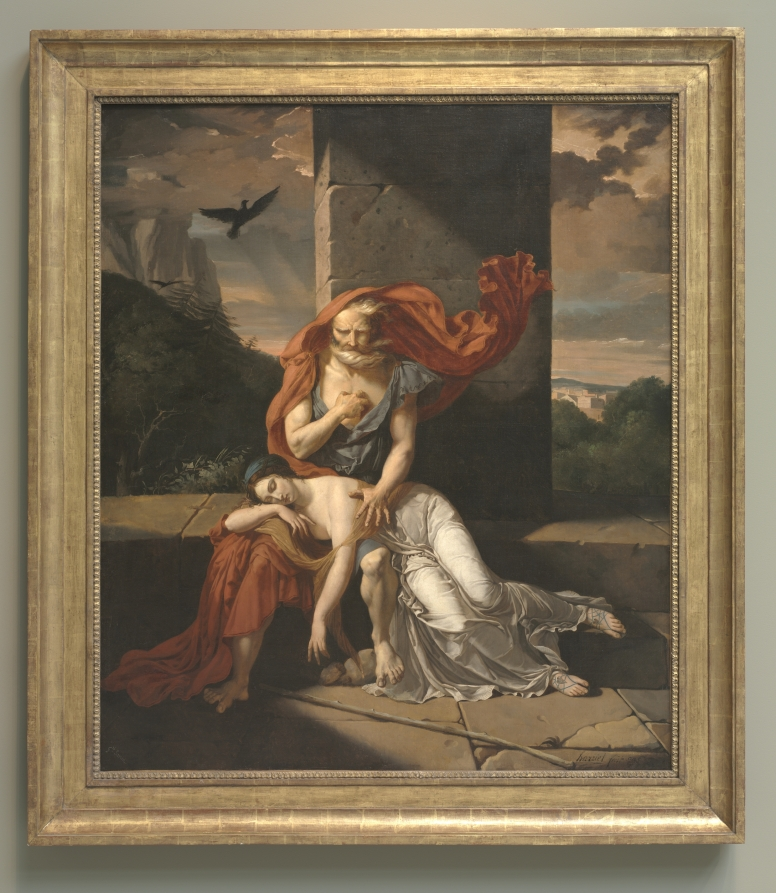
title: Oedipus at Colonus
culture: France, 18th century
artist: Fulchran Jean Harriet (French, 1778–1805)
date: 1798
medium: oil on canvas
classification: Painting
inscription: on reverse of stretcher: white sticker "57/78", chene label; on obverse: lower right "harriet fcit an6"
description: The ancient mythical Greek king Oedipus fulfilled his fate by unknowingly killing his father and marrying his mother. He subsequently blinded himself and was exiled. Here, Oedipus reprimands himself, while protecting his daughter Antigone. Oedipus became popular in France just after the French Revolution, since the subject addressed the return of exiles. The ancient Greek writer Sophocles provided the best-known version of the tragedy, but an interpretation that played in Paris in 1797 inspired Harriet’s work.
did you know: Fulchran Jean Harriet died young at age 29, and less than 10 of his works survive today.